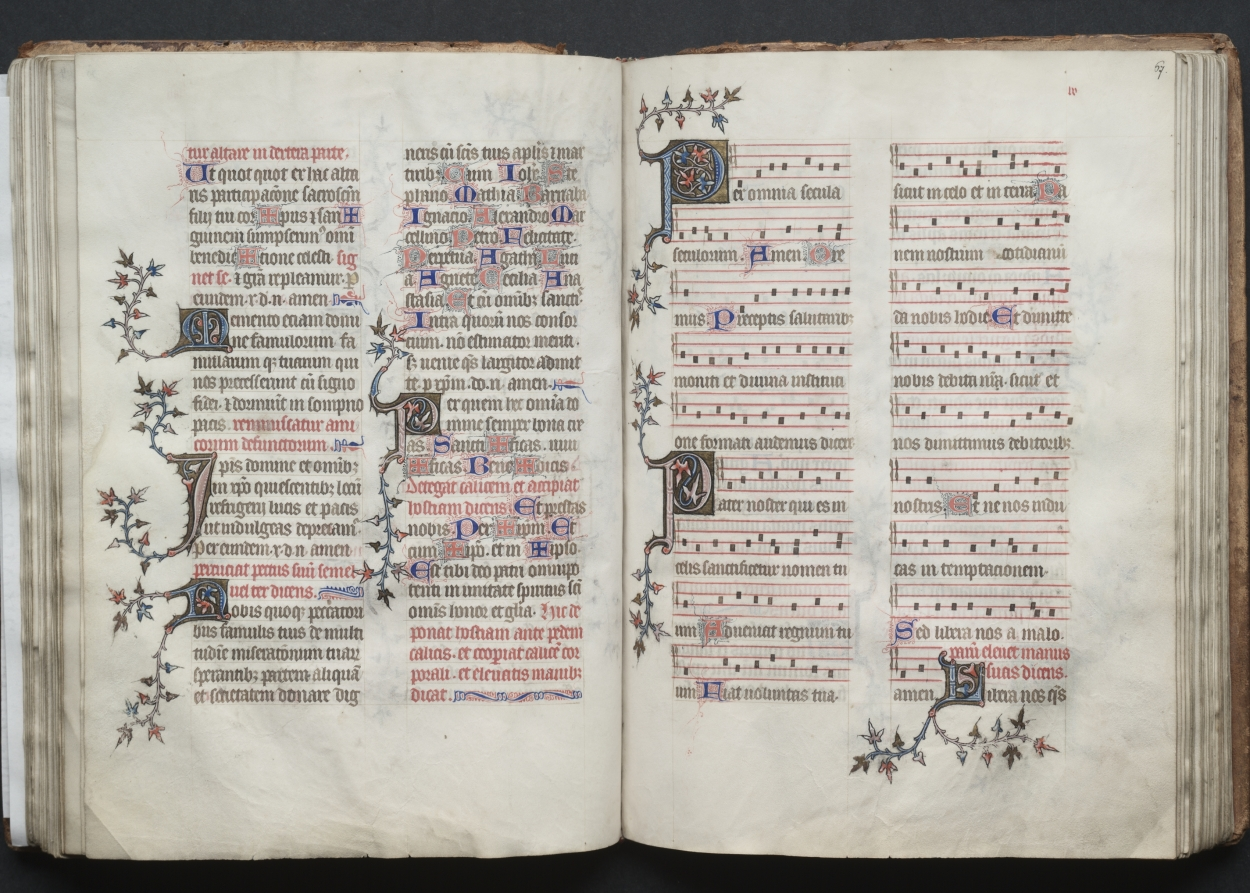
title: The Gotha Missal: Fol. 66v, Text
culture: France, Paris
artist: Master of the Boqueteaux (French)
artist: and Workshop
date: c. 1375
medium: ink, tempera, and gold on vellum; blind-tooled leather binding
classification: Bound Volume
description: The style and quality of this manuscript's decoration is typical of deluxe Parisian books made for aristocratic or royal patrons. Most of the book's decoration appears to be the work of the Master of the Boqueteaux, an artist active at the court of King Charles V (died 1380). His style was apparently shared by a number of book illuminators working in and around Paris. It is very possible that the Gotha Missal belonged to Charles V, but is not provable because the manuscript has no royal portraits and lacks a colophon. Given the book's magnificent decoration, however, it would seem that it was produced for a Valois prince, if not for the king himself. The manuscript receives its name from the German dukes of Gotha, its later owners.